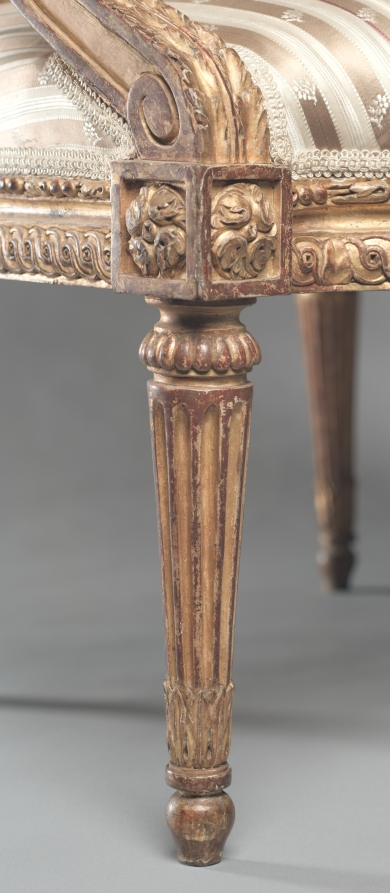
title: Armchair (Fauteuil) (2 of 2)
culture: France, 18th century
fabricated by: Jean-Baptiste II Tilliard (French, 1797)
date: c. 1765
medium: carved and gilded wood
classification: Furniture and woodwork